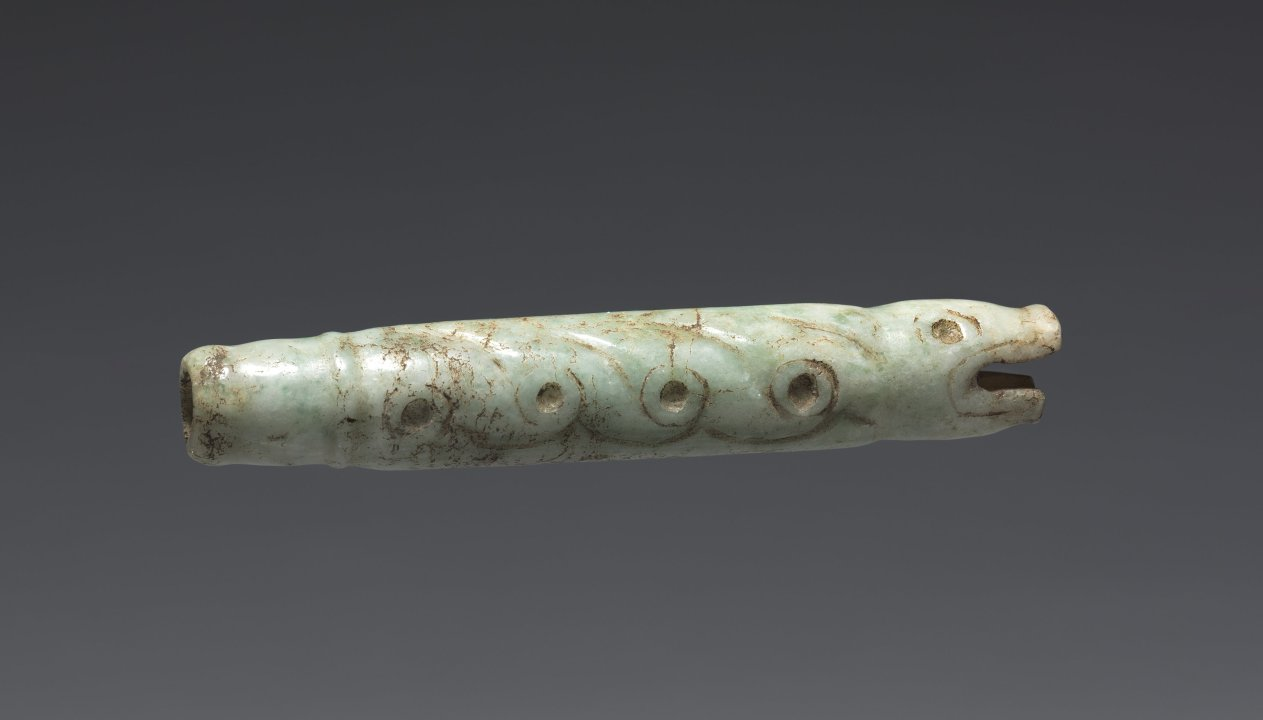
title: Serpent-form Fan Handle(?)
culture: Central Mexico, Mixtec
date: 900–1519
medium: pale green jade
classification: Sculpture